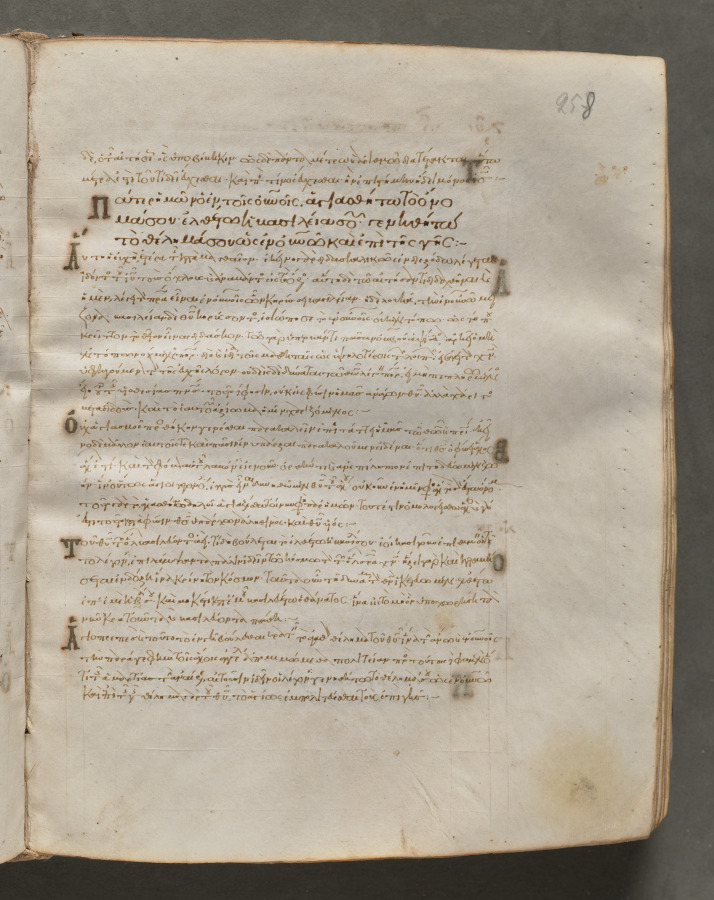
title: Text, folio 258 (recto), from a Gospel Book with Commentaries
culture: Byzantium, Constantinople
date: c. 1000–1100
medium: ink, tempera, and gold on vellum; leather binding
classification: Bound Volume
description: Each of the four gospels in this book opens on a page with brilliantly illuminated borders depicting the author of the text as well as birds—principally peacocks, symbols of the immortality of the soul—and fountains, representing the fountain of life and the salvation of the soul. This volume consists of 428 leaves with texts in Greek. Its level of sophistication suggests that it was probably written and decorated in a monastery in Constantinople.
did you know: Gospel books were carried in procession through Byzantine churches.